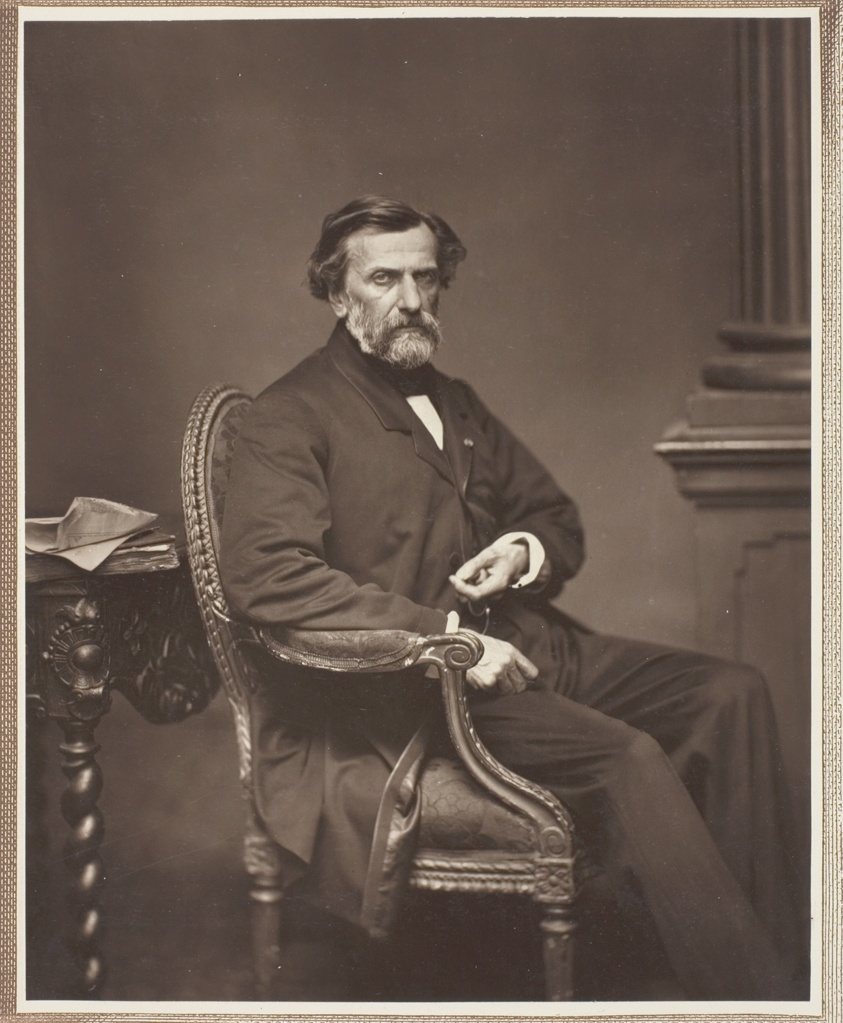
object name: Photograph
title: Amb. Thomas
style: 19th century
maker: Antoine Samuel Adam-Salomon (French, 1811–1881)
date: 1876/84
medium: Woodburytype, from the periodical “Galerie Contemporaine Littéraire, Artistique” (1876), volume 1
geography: France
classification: woodburytype; photomechanical process; photography; photograph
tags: Collected by Hugh Edwards, Contemporaine Littéraire